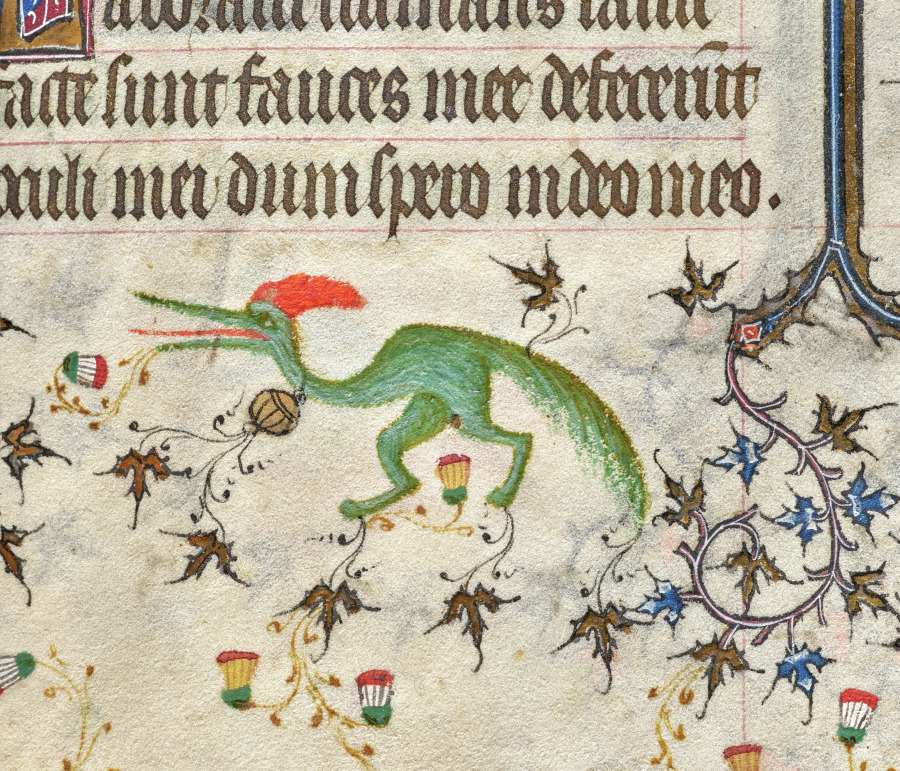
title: Hours of Charles the Noble, King of Navarre (1361-1425): fol. 186r, Text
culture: France, Paris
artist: Master of the Brussels Initials and Associates (French)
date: c. 1405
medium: ink, tempera, and gold on vellum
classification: Bound Volume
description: This precious volume was obviously highly prized by its owner, the French-born King of Navarre, who had his coat of arms painted on no less than twenty folios. Rather than directly commissioning this manuscript from a specific workshop, it seems that Charles the Noble acquired his book of hours -- perhaps ready-made for the luxury market -- while on a trip to Paris in 1404-05. A collaborative effort, six painting styles are evidenced within the pages of this codex, those of two Italians, two Frenchmen, and two Netherlanders. The painter who was responsible for the planning and decoration of the book, and who produced seventeen of the large miniatures, was a Bolognese artist known as the Master of the Brussels Initials. His principal assistant, responsible for most of the borders, was a Florentine who signed his name "Zecho" da Firenze on folio 208 verso.